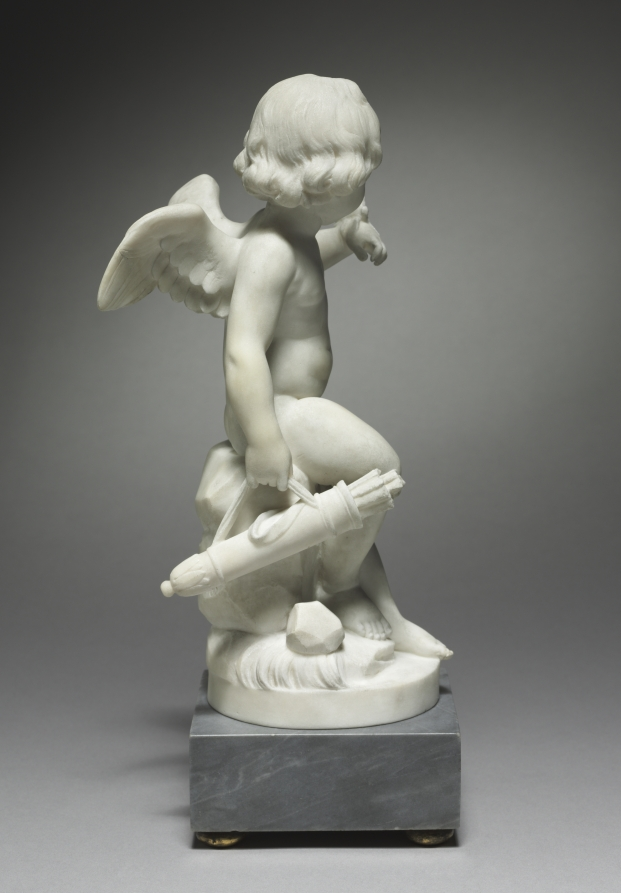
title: Fickle Love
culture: France, 19th century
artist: after Augustin Pajou (French, 1730–1809)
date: 1800s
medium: marble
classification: Sculpture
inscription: Signed Pajou f (fecit) 1787